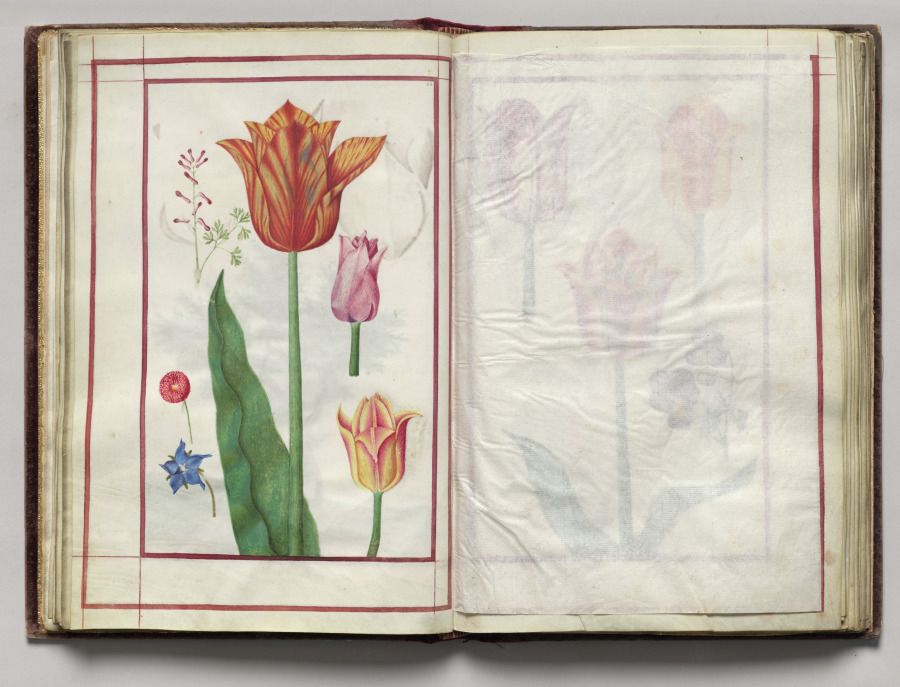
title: Tulip, Pink Dicentra, English Daisy (Bellif), and Borage, folio 13 (verso), from Florilegium (A Book of Flower Studies)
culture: France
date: 1608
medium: watercolor, ink, silver, and gold over occasional traces of pencil, on vellum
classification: Bound Volume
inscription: Dated: Poitiers 1608 (on frontispiece) Signed: On frontispiece in black ink, lower right: Van Kuyk Notation on drawing: Frontispiece: in pencil, lower margin: * élève de Van Kessel, peintre flammand (* in pencil also appears in front of Van Kuyk's name).